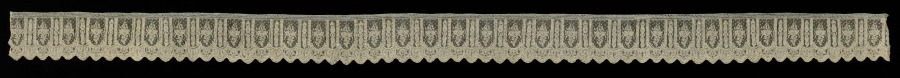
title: Lace Edging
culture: France, Alençon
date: 1800s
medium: Linen: needle lace (Point d'Alençon)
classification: Lace